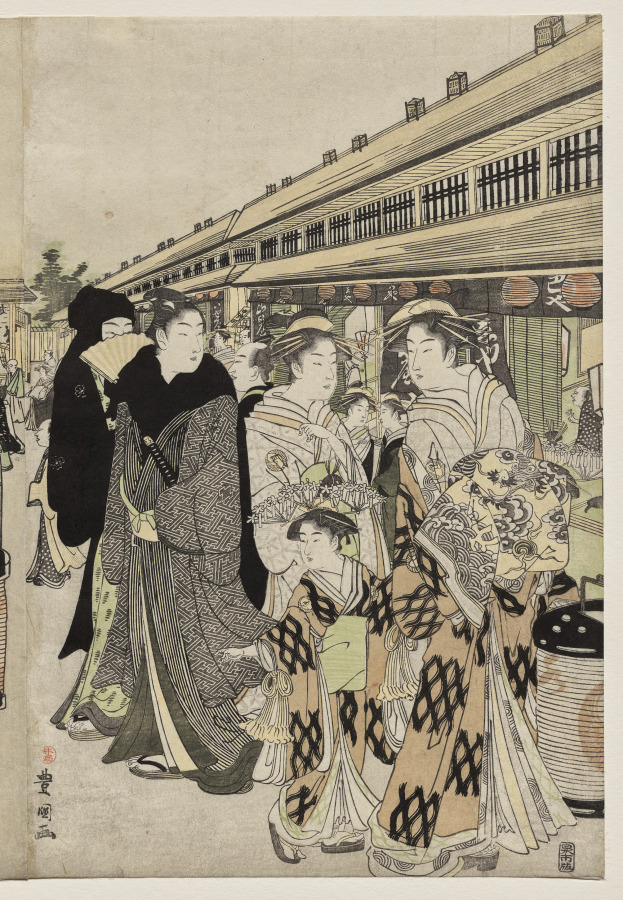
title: Courtesans Promenading on the Nakanochō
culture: Japan, Edo period (1615–1868)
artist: Utagawa Toyokuni (Japanese, 1769–1825)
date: c. 1790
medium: One of a triptych of color woodblock prints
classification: Print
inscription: Signature: Toyokuni ga Publisher: Izumiya Ichibei (Senichi han)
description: Nakanochō was the main street in Yoshiwara, a famous walled pleasure district that housed as many as 4,000 courtesans. In the early evening, elaborately dressed courtesans accompanied by attendants promenaded on the central thoroughfare, as in this scene. The open buildings with shop curtains hanging from their eaves are teahouses, establishments where men could arrange appointments with courtesans of the more prestigious brothels.